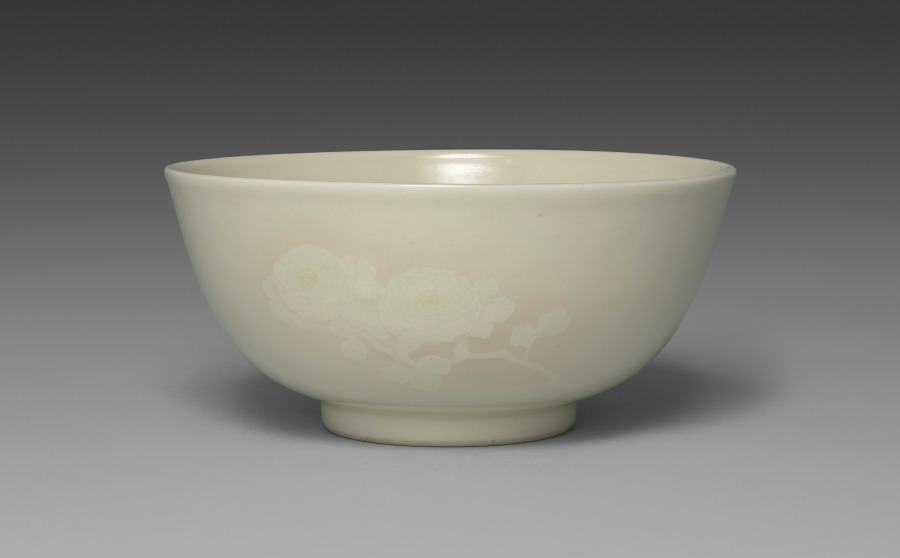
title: Sweets Bowl with Chrysanthemums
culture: Japan, Taishō period (1912–26) or Shōwa period (1926–89)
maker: Seifū Yohei IV (Japanese, 1872–1951)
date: 1914–46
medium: Porcelain with in-glaze and underglaze color and molded design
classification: Ceramic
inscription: 清風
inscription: 成山清風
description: Sweets bowls hold the confections enjoyed when drinking tea. This bowl and CMA 2022.207 offer an important lesson in appreciating Yohei IV’s ceramic practice, for while they have the same design and shape and are made with the same materials, the execution of the pieces makes them entirely different upon close inspection, thereby demonstrating the range of possible production results from a single template. Each bowl has the same composition of two different types of chrysanthemum flowers, one with long, slim, knifelike petals and the other with short, rounded, multilayered petals, shown running around its surface in low relief. The centers of the flowers are painted with yellow under the glaze. Yohei III formulated a number of new underglaze colors during his career, and this is likely one of them. The storage box lid provides abbreviated descriptions of the complex processes used in the surface decorations. It identifies the bowl inside as “Sweets dish with picture of chrysanthemum in kanpakuyū.” The box lid has on its exterior the seal reading “Seizan Seifu” 成山清風, which includes Yohei IV’s style name, but no signature. Instead, a signature is found on the interior of the box lid, accompanied by another seal, this time a gourd-shaped seal reading “Seifu.” The ink inscriptions are in a mode closer to formal script. This bowl, with the signature on the inside of the box lid, stands out for a distinctively bubble-filled glaze with a heavier pink effect, as well as more noticeable yellow at the flowers’ centers and deeper carving in the relief decoration. The design has crept much closer to the rim. A closer look at the delineation of the flower petals reveals that the designs differ at times with respect to which petals appear in front or behind others. The centers of the bases of both bowls are incised with “Seifu” in a manner matching many other works by Yohei IV, although there are slight differences. As one might expect from the other differences in the bowls, the characters on the base of the subtle bowl, CMA 2022.207, are gentler, finishing in a tapering out of the strokes. The strokes on this bold bowl end in triangular pinheads.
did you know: Here Yohei IV used his father’s kanpakuji formula, with underglaze pink for the gradated wash of color surrounding the flowers.